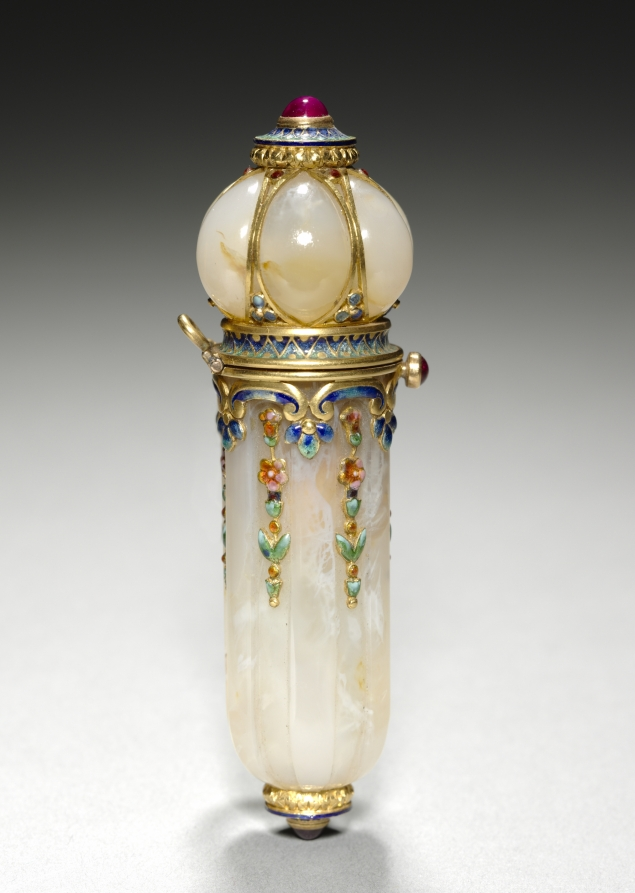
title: Perfume Vial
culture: France, Paris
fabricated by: Tecla Firm (French)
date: c. 1900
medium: agate with enamel, gold, rubies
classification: Miscellaneous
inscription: "Tiffany & Co." engraved at edge of top.